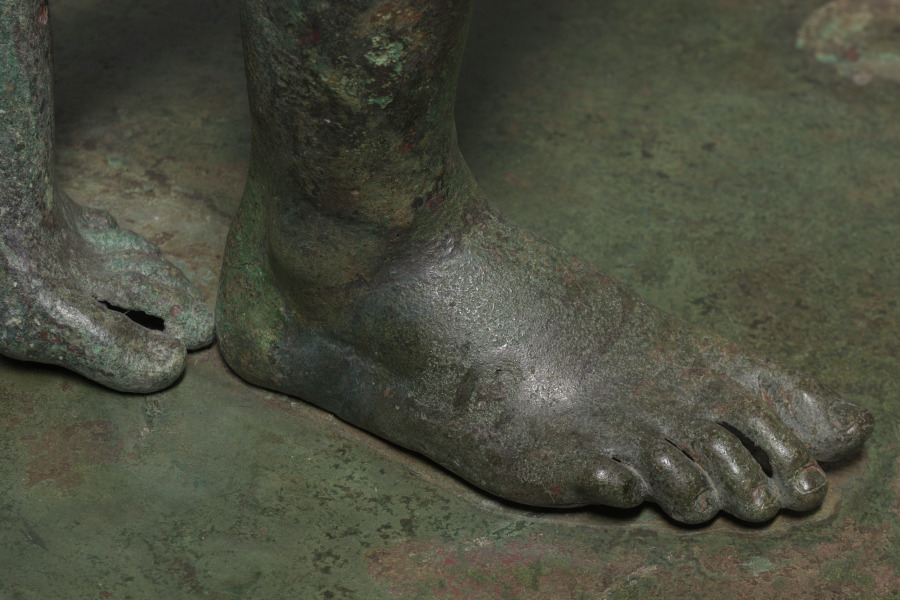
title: Baseplate for the Cleveland Apollo: Apollo Sauroktonos (Lizard-Slayer) or Apollo the Python-Slayer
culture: Greece, Athens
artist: possibly by Praxiteles (Greek, Athenian, c. 400–330 BCE)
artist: or Follower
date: c. 350–200 BCE, or possibly later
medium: bronze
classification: Sculpture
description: The baseplate is nearly square in shape, but two edges are noticeably concave. A modern hole facilitates mounting (with a modern rod in the right leg), and marks show the placement of both feet, once attached with lead solder. A nearly circular lead solder mark located at the front left corner likely corresponds to the placement of a small tree, now lost.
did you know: Most large-scale ancient bronze sculptures stood on bases made of stone rather than bronze.